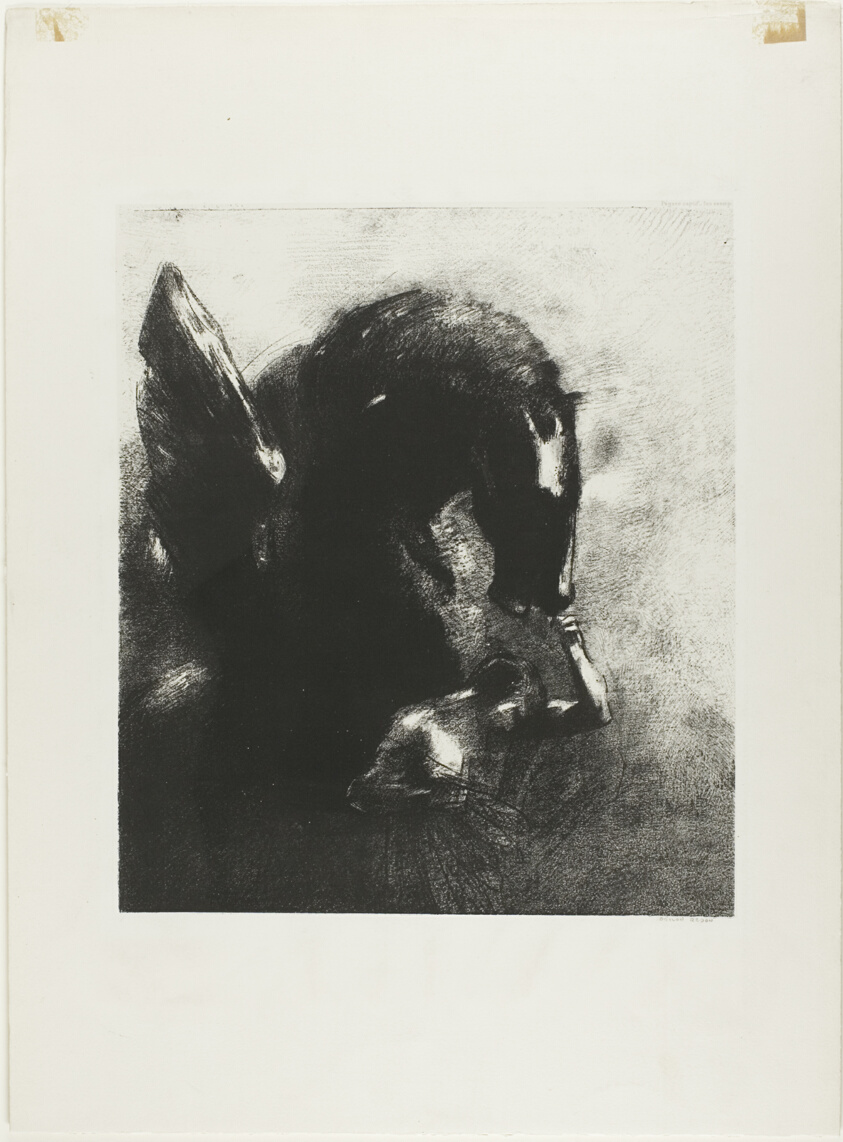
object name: Print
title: Captive Pegasus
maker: Odilon Redon (French, 1840-1916)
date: 1889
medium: Transfer lithograph on mounted ivory China paper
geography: France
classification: lithograph; print; prints and drawing; paper